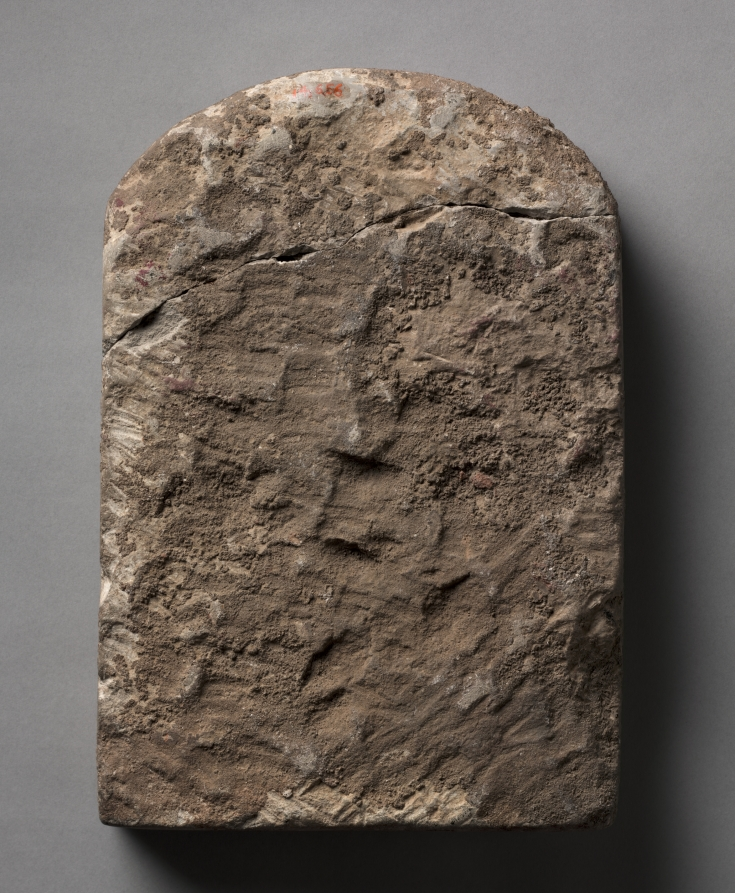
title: Stele of Neferrenpet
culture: Egypt, Probably Thebes, New Kingdom, late Dynasty 18, 1540-1296 BC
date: 1400–1296 BCE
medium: limestone, originally painted and gilded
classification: Sculpture